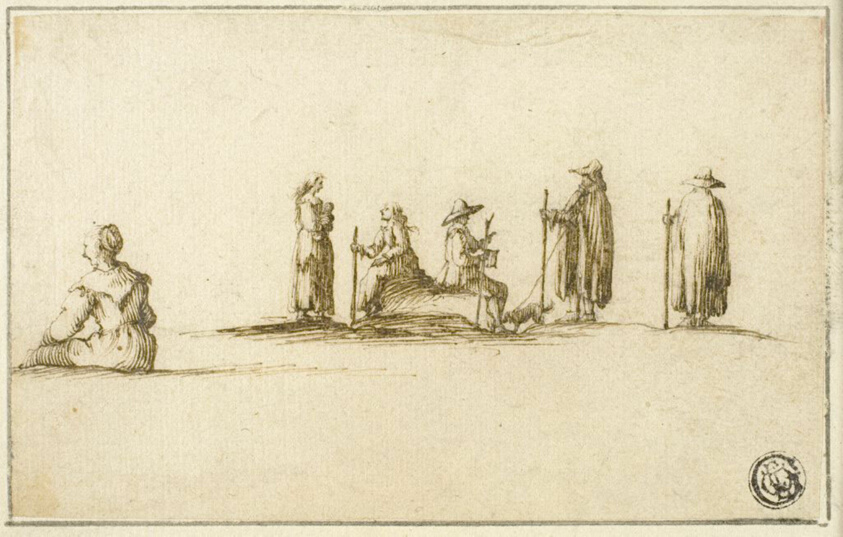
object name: Drawing and Watercolor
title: Group of Seated and Standing Men and Women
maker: After Stefano della Bella; Italian, 1610-1664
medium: Pen and brown ink, over traces of graphite, on buff laid paper, laid down on cream laid paper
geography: Italy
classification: pen and ink drawings; drawings (visual works); prints and drawing